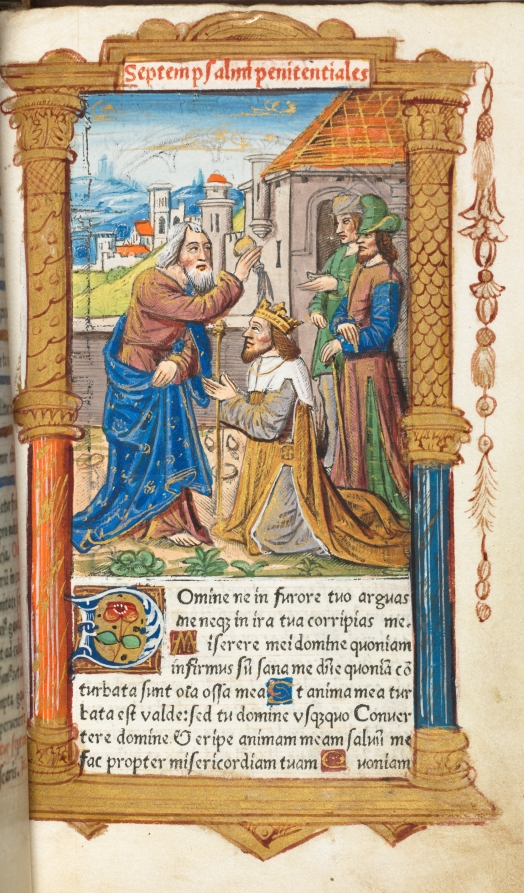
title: Printed Book of Hours (Use of Rome): fol. 65r, David and Samuel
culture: France, Paris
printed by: Guillaume Le Rouge (French, Paris, active 1493–1517)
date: 1510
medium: 112 Printed folios on parchment, bound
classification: Bound Volume